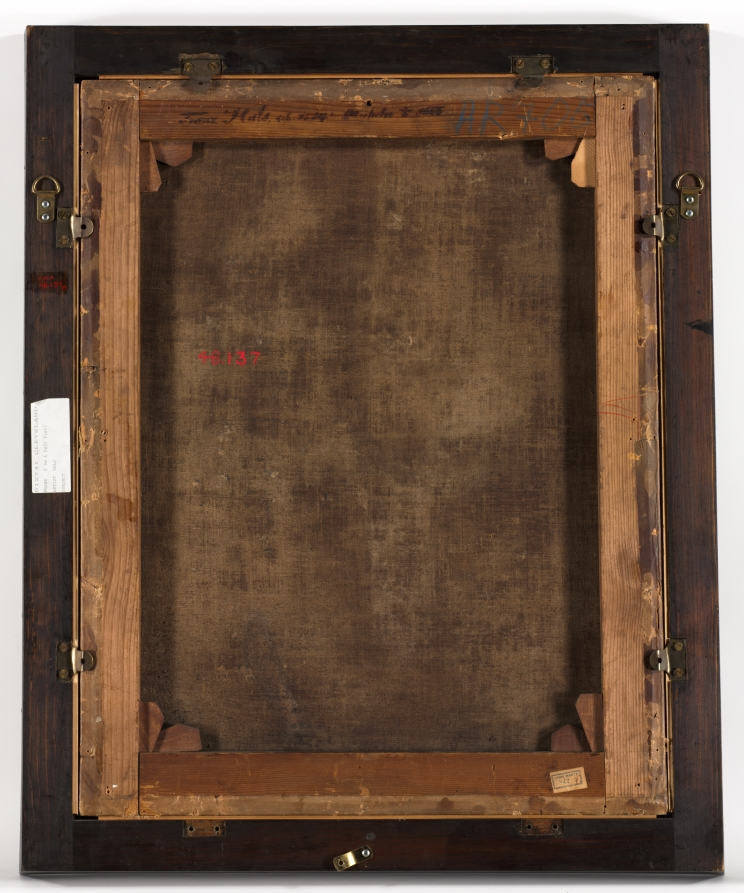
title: Portrait of a Woman, probably Aeltje Dircksdr. Pater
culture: Netherlands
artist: Frans Hals (Dutch, c. 1581–1666)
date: 1638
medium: oil on canvas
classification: Painting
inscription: Inscribed upper left: "AETAT SUAE 41 / ANNO 1638"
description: Portraits by Hals often feature bold, jagged brushstrokes. This portrait shows him experimenting with the “wet-into-wet,” technique, in which layers of paint were added in succession without being allowed to dry in between. Note the blended strokes used at the woman’s hairline to suggest individual strands of hair. The sitter has been tentatively identified as Aeltje Dircksdr. Pater (1597–1678), wife of the Haarlem brewer and burgomaster (mayor) Jan de Wael (1594–1663). An inscription states she was 41 when Hals painted her.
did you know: Jewelry, lace, and sumptuous fabrics show off this woman's wealth—and the artist's skill in painting them.